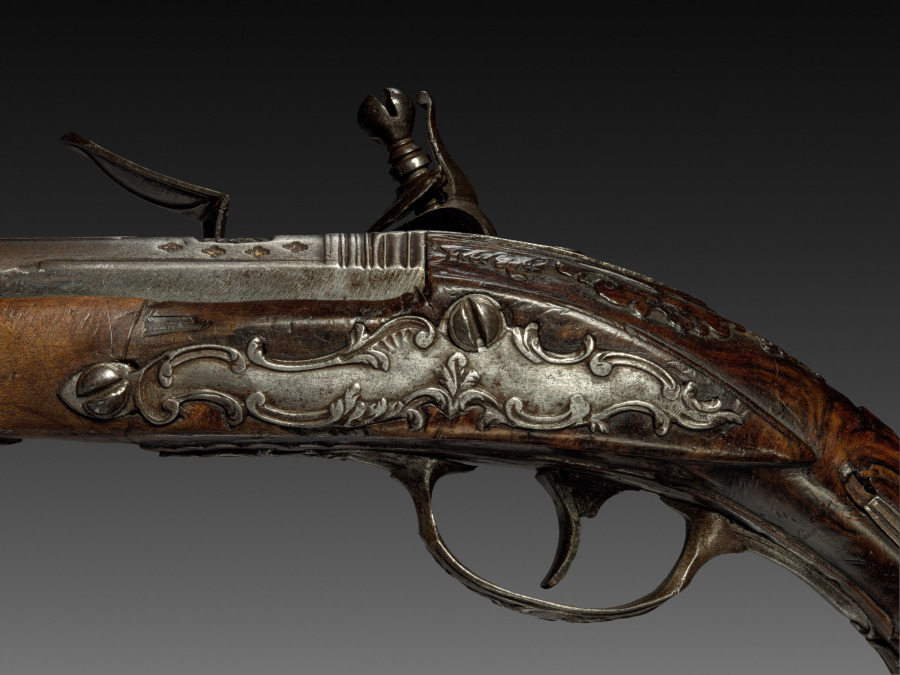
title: Flintlock Pistol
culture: Italy, Brescia, 18th century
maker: Bortolo Agazzi (Italian)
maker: Lazaro Lazarino (Italian)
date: 1700s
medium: steel with traces of gilding; walnut stock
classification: Arms and Armor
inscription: on lock: Bortolo Agazzi; on barrel: Lazaro Lazarino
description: The flintlock was the most popular style of lock in all of Europe in the mid 1600s through the 1700s except in Spain and Italy where the snaphance was more dominant. This pistol's shine comes from the gold that was applied to the steel shaft. This shiny surface is set off by the rich walnut stock. Upon close inspection, you can see areas of damage to the walnut and even a missing section of decoration on the rear of the handle.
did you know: The term flintlock is used to describe any firearm that uses a flint-striking ignition mechanism.